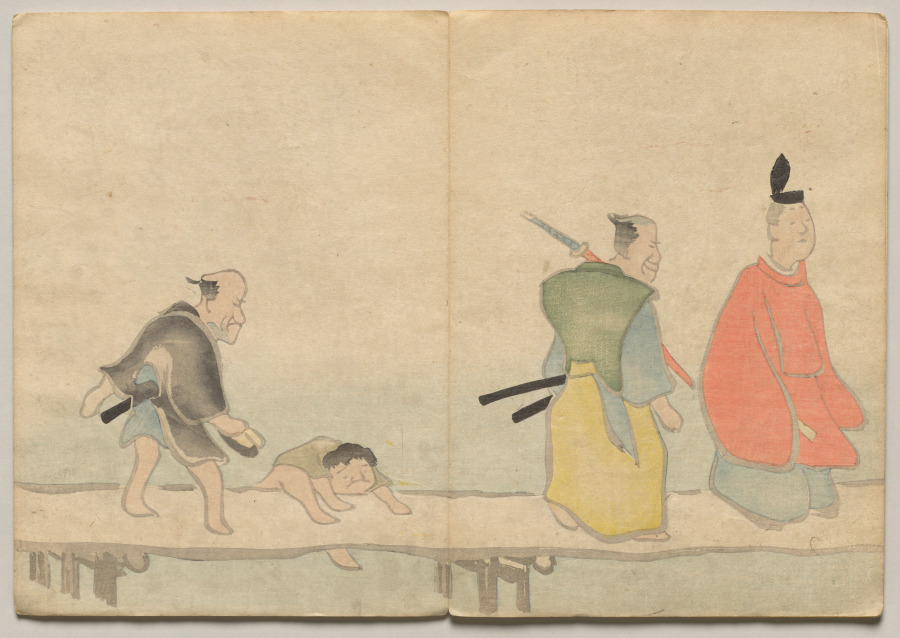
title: Scene from The Kōrin Picture Book (Volume 1)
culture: Japan, Edo period (1615–1868)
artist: Nakamura Hōchū (Japanese, d. 1819)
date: 1800s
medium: color woodblock printed book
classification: Bound Volume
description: Ogata Korin (1658-1716) was one of the most admired artists of Rimpa, or "decorative school painting." These books by the charming later-generation Rimpa artist Hochu record Korin's inventive designs.